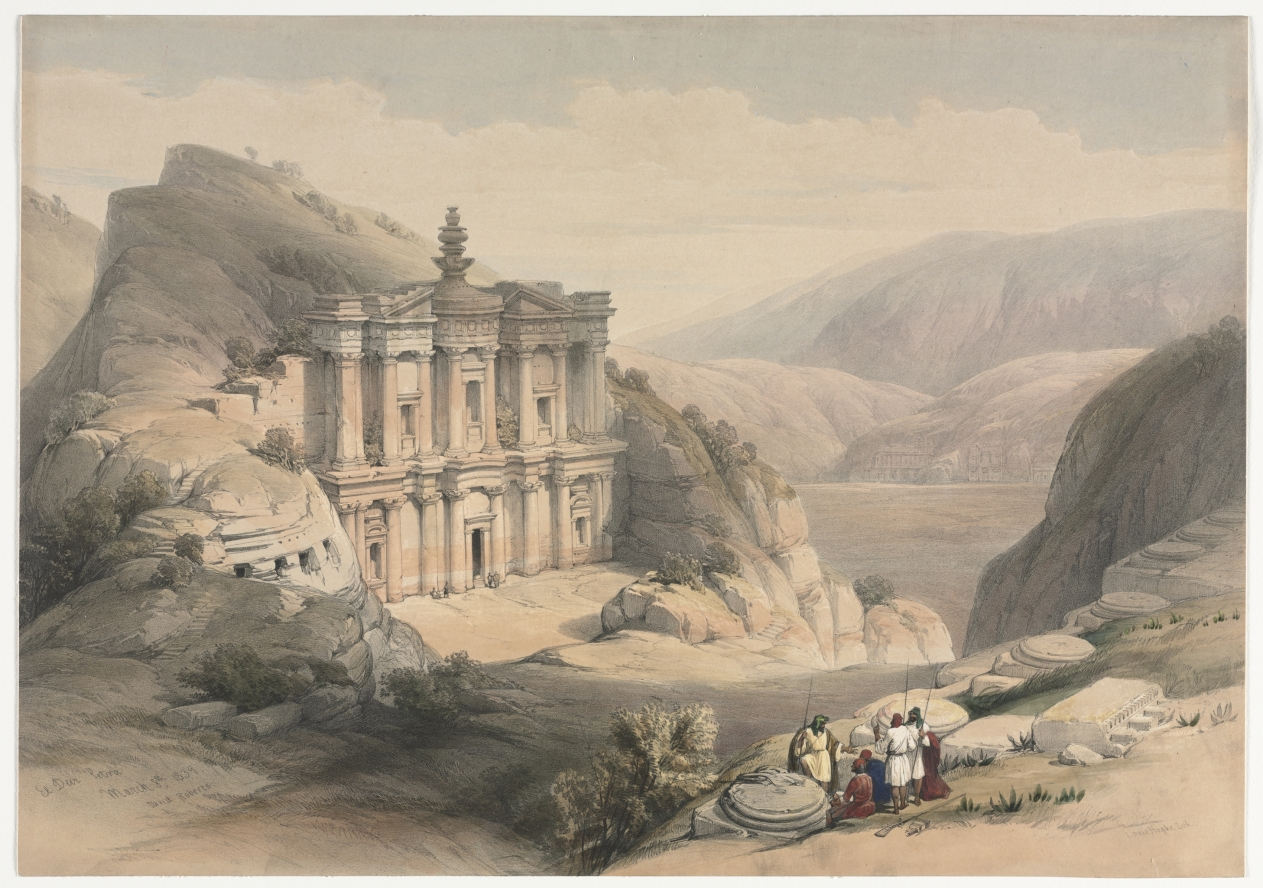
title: El Deir Petra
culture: England, 19th century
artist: David Roberts (Scottish, 1796–1864)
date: 1839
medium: color lithograph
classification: Print